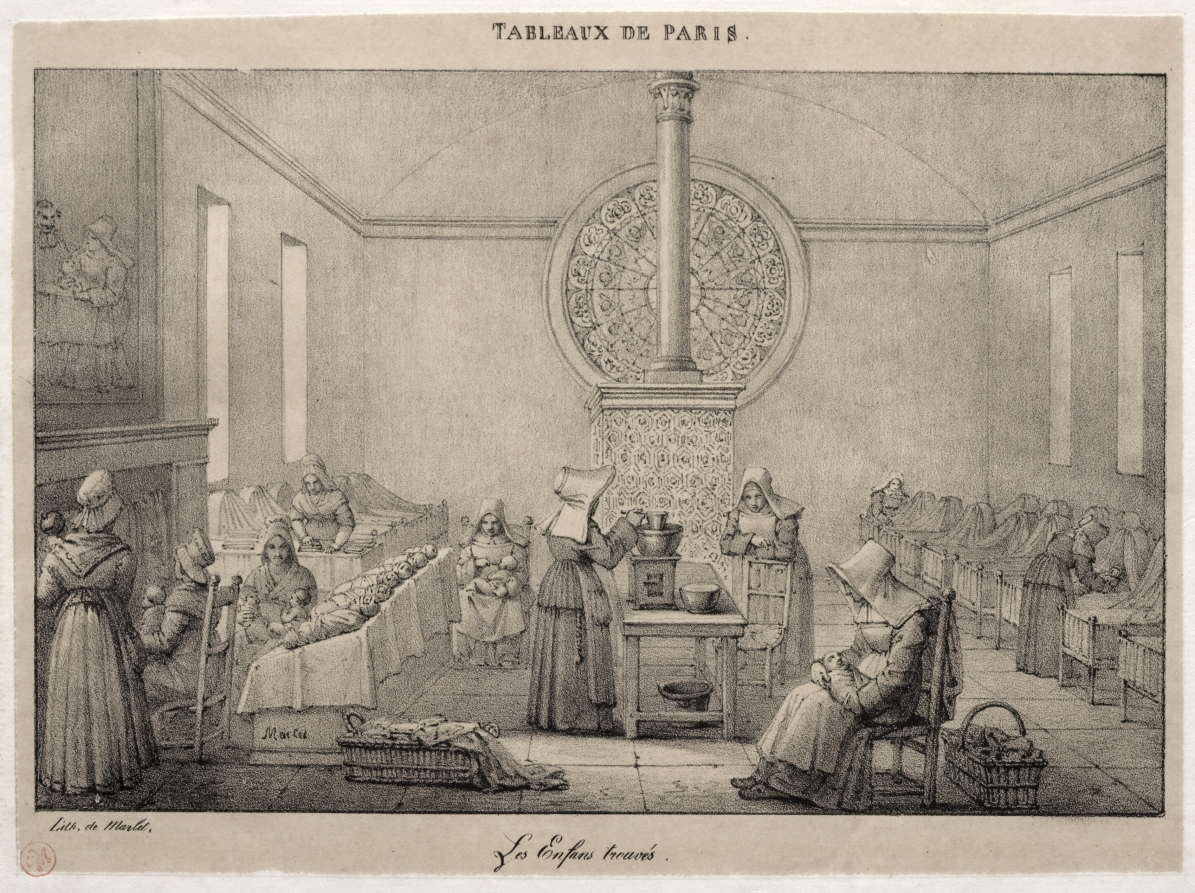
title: The Foundling Hospital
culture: France, 19th century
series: Scenes of Paris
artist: Jean Henri Marlet (French, 1770–1847)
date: 1820s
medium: lithograph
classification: Print